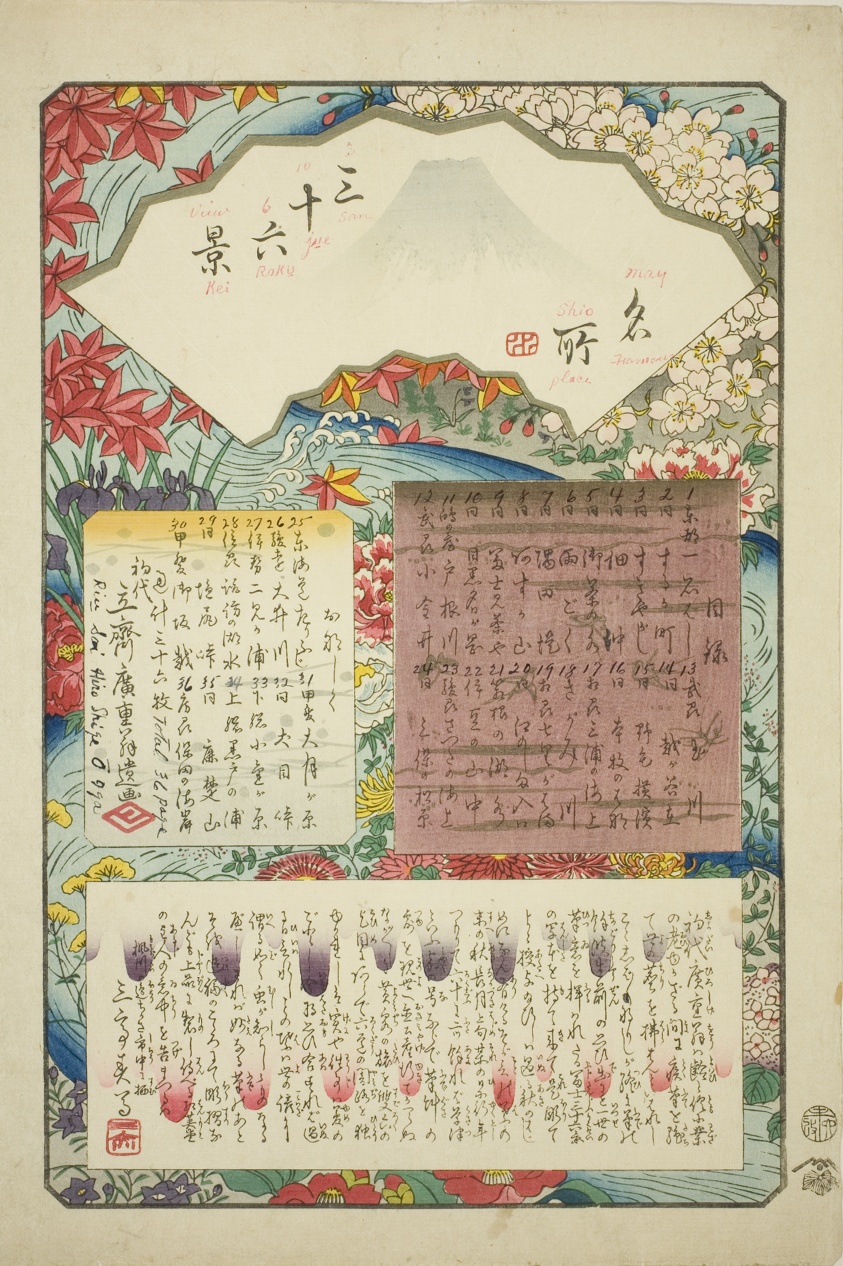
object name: Print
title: Title page for the series "Thirty-six Views of Mount Fuji (Meisho sanjurokkei)"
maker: Utagawa Hiroshige 歌川 広重; Japanese, 1797-1858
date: 1859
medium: Color woodblock print; oban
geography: Japan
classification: print; asian art